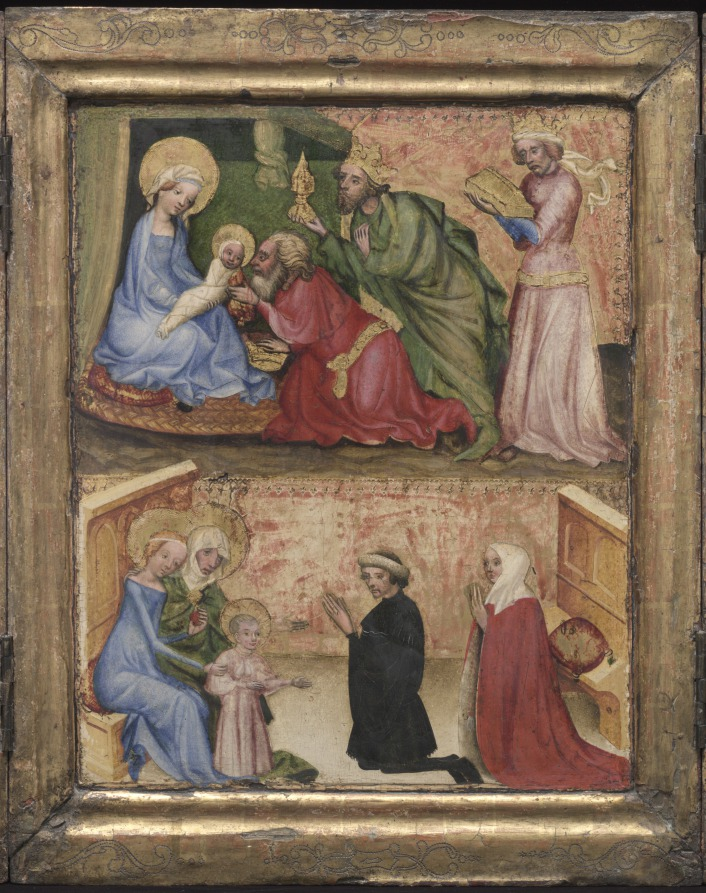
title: The Adoration of the Magi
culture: Austria, Salzburg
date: c. 1424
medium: tempera and gold on wood (oak)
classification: Painting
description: This small winged altarpiece, called a triptych, was undoubtedly made for private use. The donor and his wife are shown in the lower central scene kneeling before the Virgin, her mother Saint Anne, and the Christ child. Above is the Epiphany with the Three Kings presenting gifts to a tightly swaddled Christ.